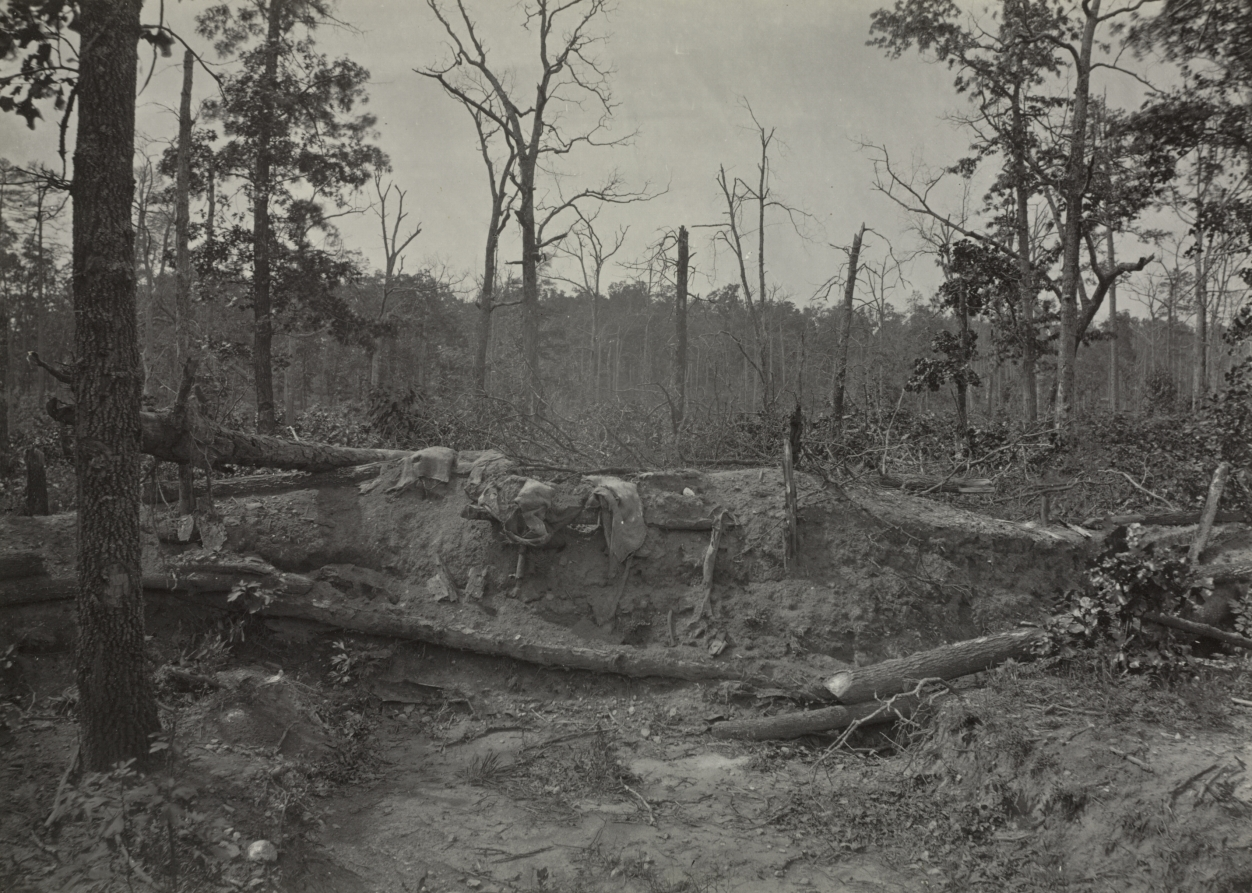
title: Battlefield of New Hope Church, Georgia, No. 2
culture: America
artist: George N. Barnard (American, 1819–1902)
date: 1865–1866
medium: albumen print from wet collodion negative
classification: Photograph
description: From the medium’s beginnings in the 1830s through the 1880s, most photographs were intimately scaled objects meant for the hand, the album, and the home. As the medium began being used to document landscapes and monuments in the 1850s, larger scale processes arose such as the glass-plate negative. The mammoth print truly seemed gargantuan in the 1860s. For much of the 20th century, the 8-x-10-inch gelatin silver print was the norm for photojournalism; these prints were destined for reproduction in books and magazines around the same scale.